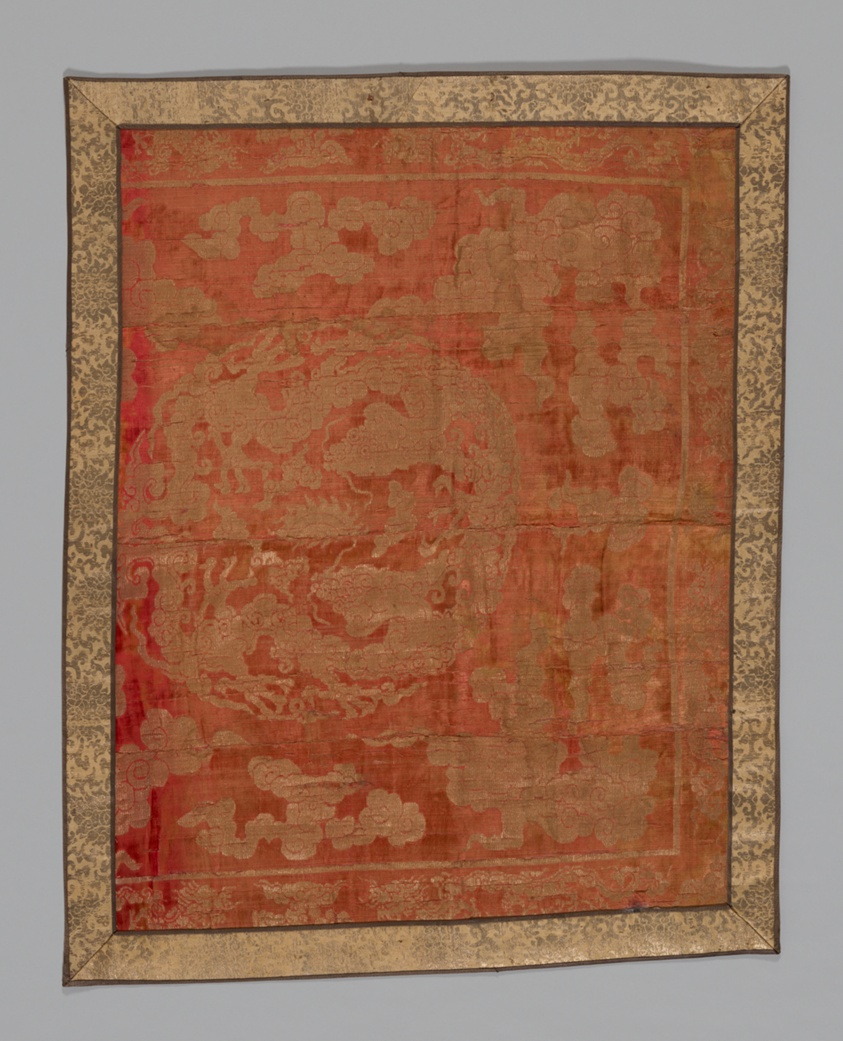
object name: Textile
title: Panel (Furnishing Fabric)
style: qing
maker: China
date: Edo period (1615–1868), 1775/1825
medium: Cut velvet, dragon and clouds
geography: China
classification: textile; weaving - velvet; weaving; furnishing textile